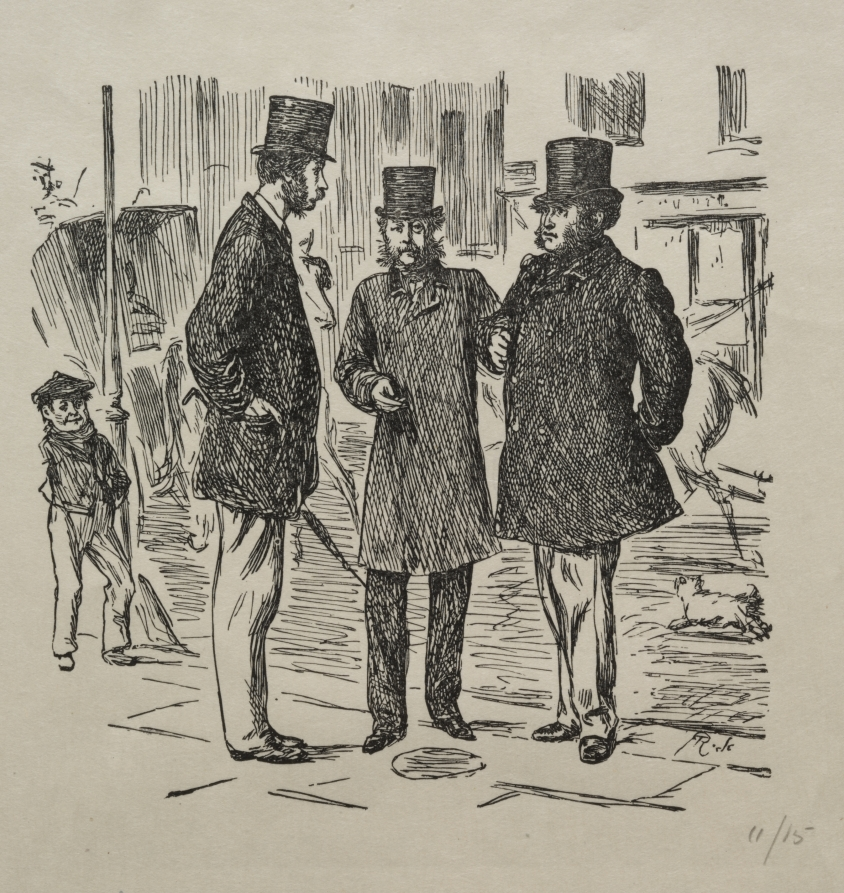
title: The Little Moment before the Introduction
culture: England, 19th century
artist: George Louis Palmella Busson Du Maurier (British, 1834–1896)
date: 1865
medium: wood engraving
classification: Print